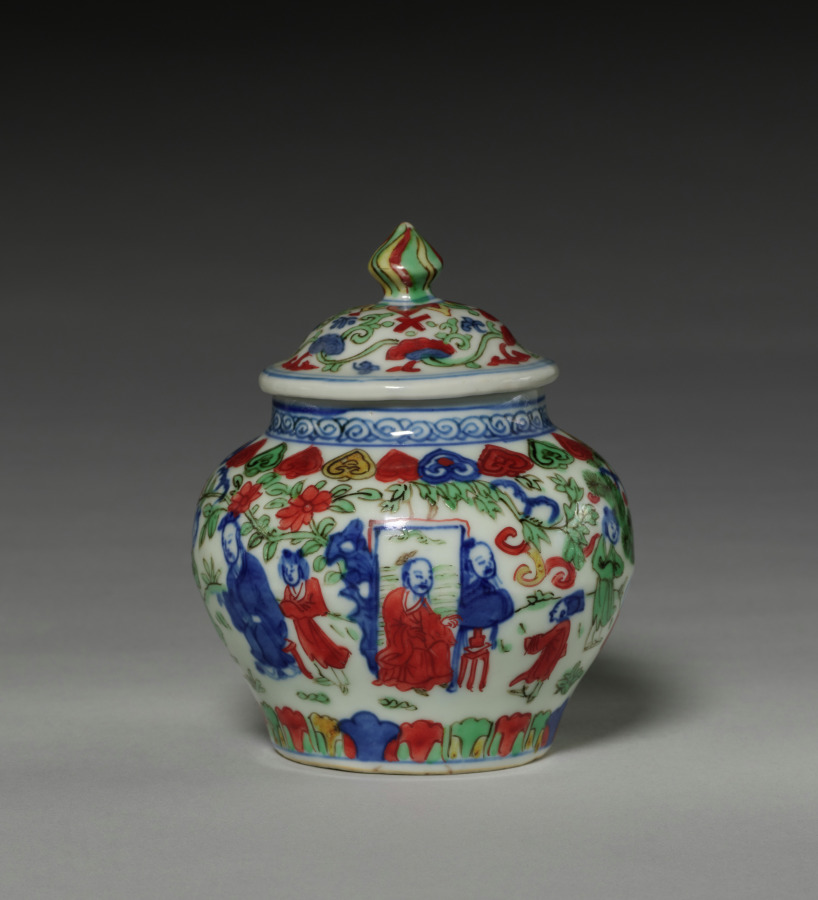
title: Covered Jar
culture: China, Jiangxi province, Jingdezhen kilns, Ming dynasty (1368-1644), Wanli reign (1573-1620)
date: 1573–1620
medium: porcelain with blue underglaze decoration and overglaze enamels in red, green, and yellow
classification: Ceramic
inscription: 大明萬曆年製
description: In the Ming (1368–1644) and Qing (1644–1911) dynasties, luxury items became more affordable to larger parts of the society, including women, merchants, and literati in non-official positions. Imperial patronage and a growing urban population encouraged consumption of luxury goods and local craftmanship. This covered porcelain jar has blue underglaze and overglaze in red, green and blue enamels. It shows Ming dynasty advancements in porcelain decoration and the creative mind of the talented artisans who made it.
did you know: This jar is painted with 16 figures of all ages enjoying a garden setting.